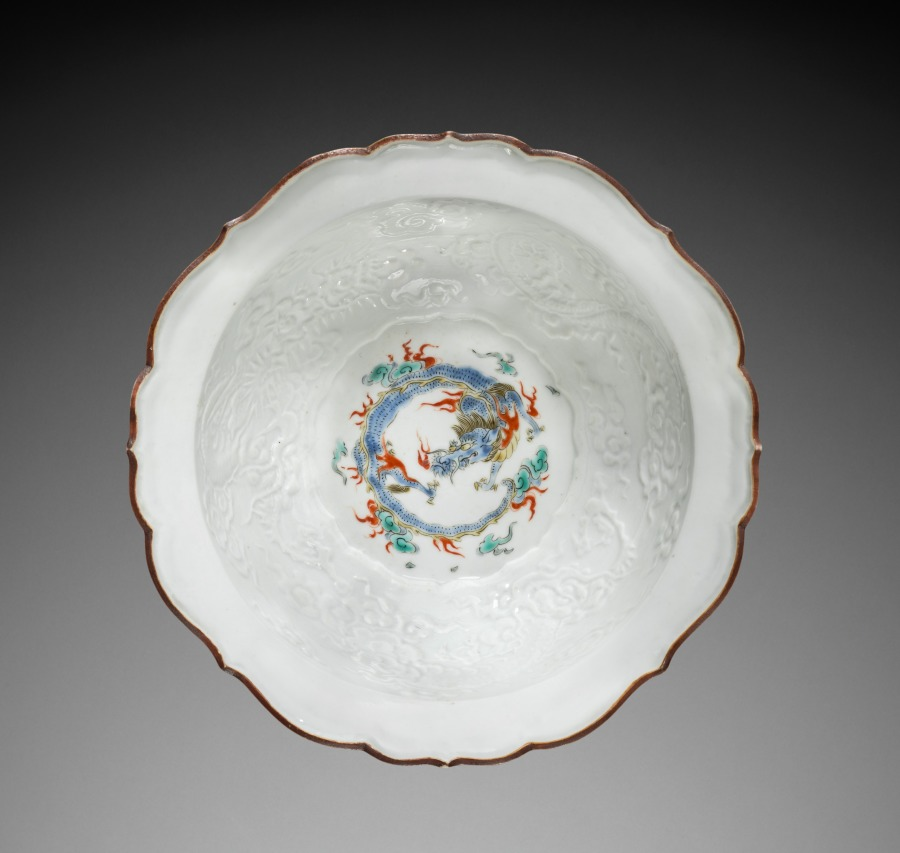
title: Deep Bowl with Dragons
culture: Japan, Edo period (1615–1868)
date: 1700s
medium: porcelain with overglaze color enamel and molding (Hizen ware, Kakiemon type)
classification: Ceramic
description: Graced with energetic dragons amid clouds, this deep bowl has a petal-shaped rim. The coiled position of the dragon in the center and the chasing action of those on the sides contribute to a sense of circular motion. The exterior shows a running figure and two birds in flight, echoing the movement in the interior.